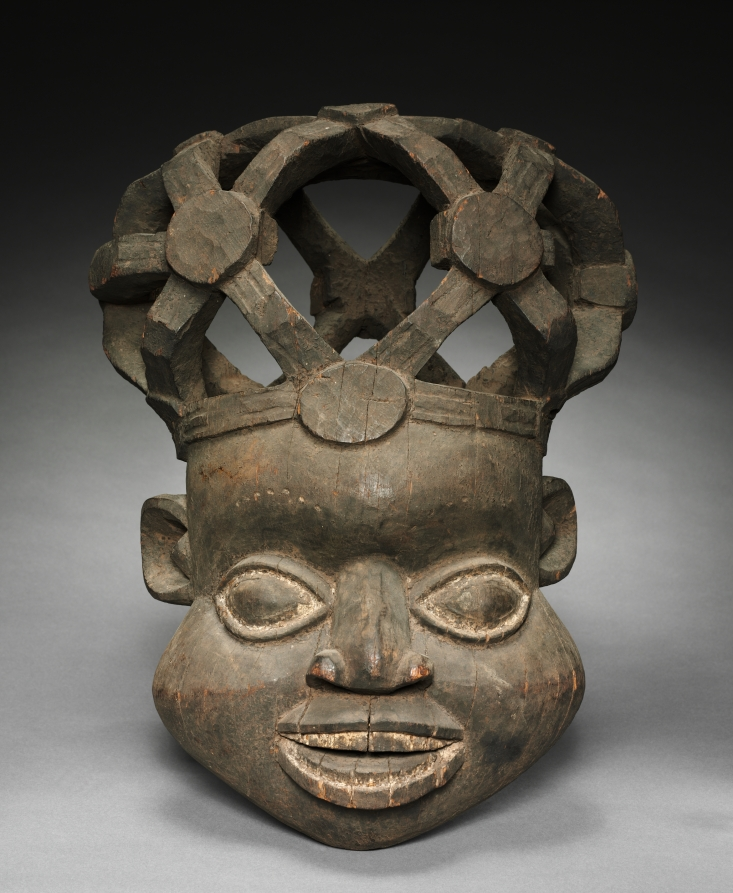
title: Helmet Mask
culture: Africa, Central Africa, Cameroon, Bamum Kingdom, Bamum-style maker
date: c. 1900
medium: Wood, kaolin, and organic materials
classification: Mask